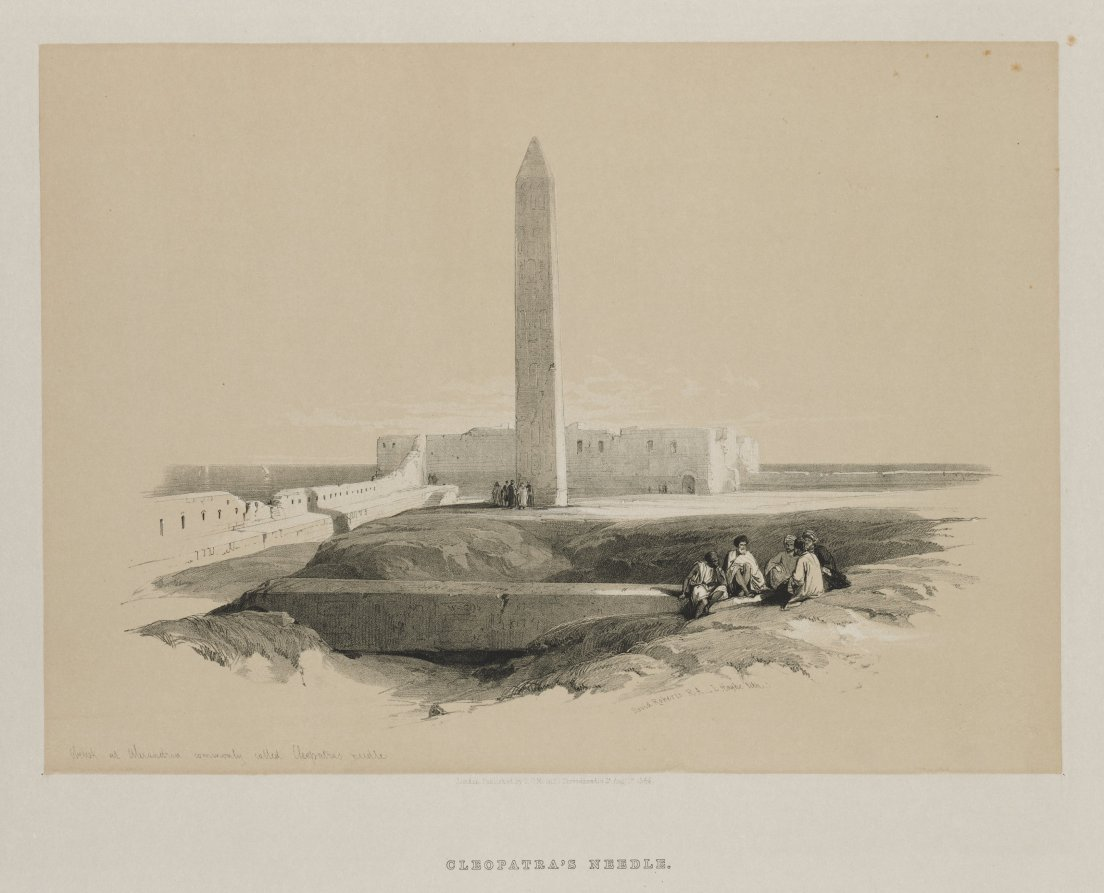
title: Egypt and Nubia, Volume I: Obelisk at Alexandria, Commonly called Cleopatra's Needle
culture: England, 19th century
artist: Louis Haghe (British, 1806–1885)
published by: F. G. Moon, 20 Threadneedle Street, London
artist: after David Roberts (Scottish, 1796–1864)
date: 1846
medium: color lithograph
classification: Print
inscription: Inscribed in plate, bottom let corner: 9